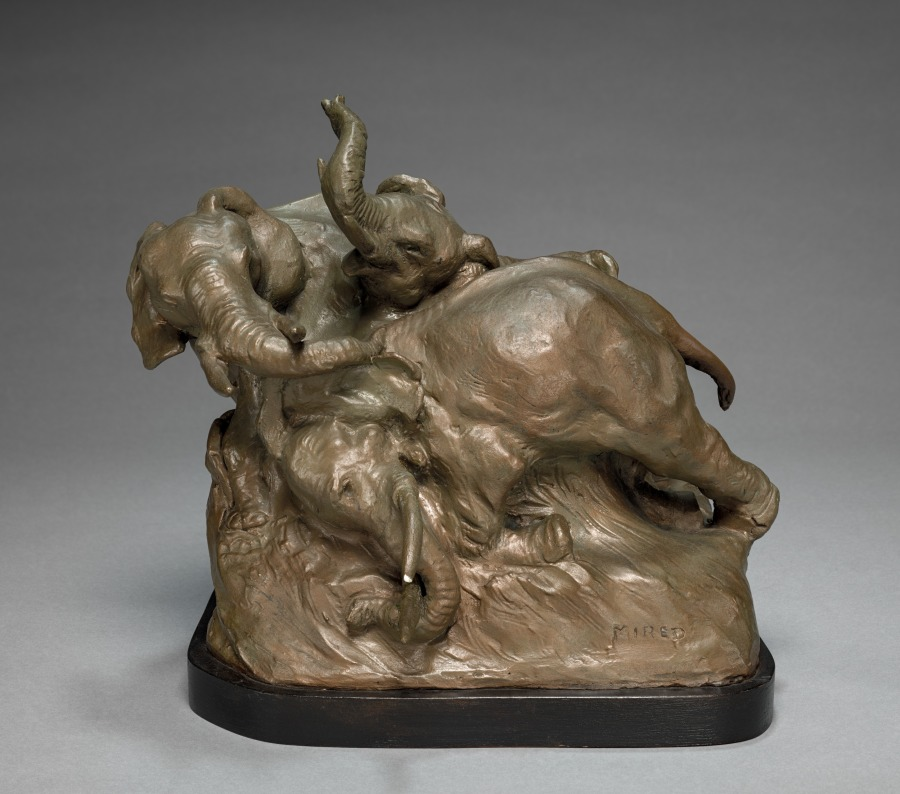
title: Mired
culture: America, Ohio, Cleveland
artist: John Ross Stewart (American, 1872–1954)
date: 1920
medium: plaster painted to resemble patinated green bronze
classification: Sculpture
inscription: incised in plaster near base: "Mired" and "JRS."